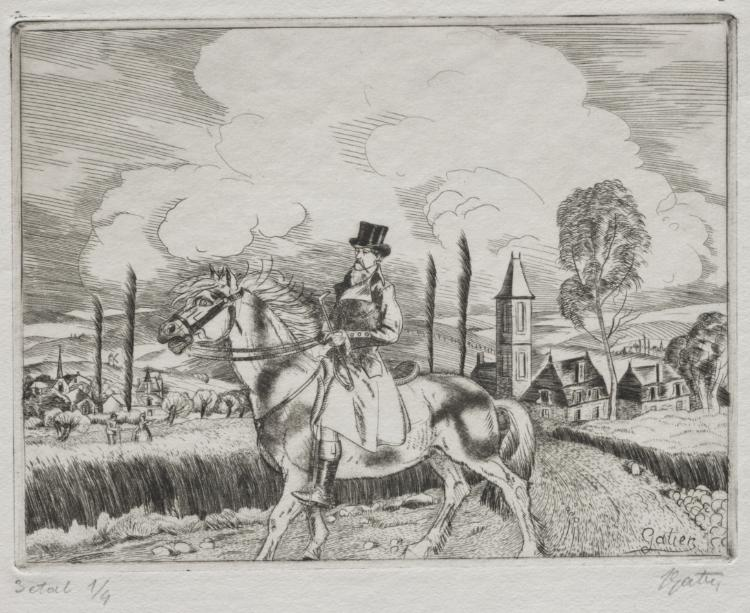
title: Le vieux gentilhomme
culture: France, 20th century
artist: Pierre Louis Gatier (French, 1878–1944)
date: c. early 1900s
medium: engraving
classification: Print